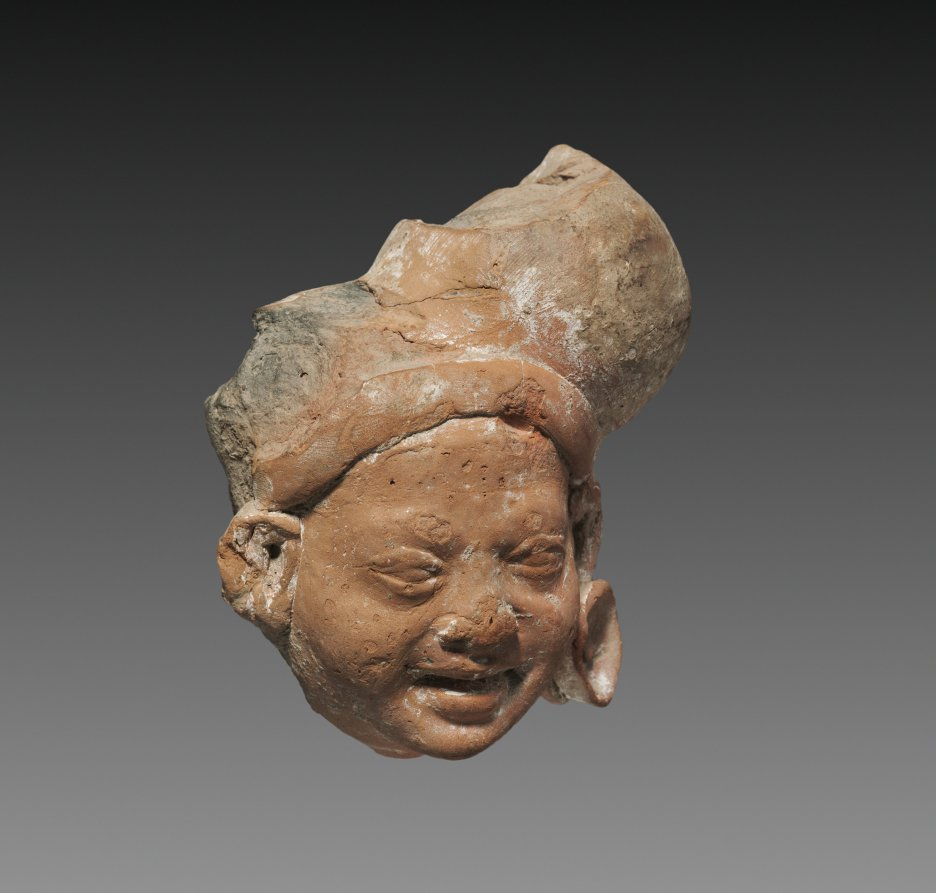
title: Male Head, possibly a Yaksha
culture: Northeastern India, Bihar, Patna, Bulandibagh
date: 300s BCE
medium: terracotta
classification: Sculpture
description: The large turban and earring suggest that this head may have belonged to a yaksha, a nature divinity worshipped for wealth and prosperity. The small scale and terracotta material imply that it may have been installed on a domestic shrine. The naturalism of the fleshy face and parted mouth are stylistic features of sculptures from the Maurya period, and this work was found at the Maurya capital of Pataliputra.